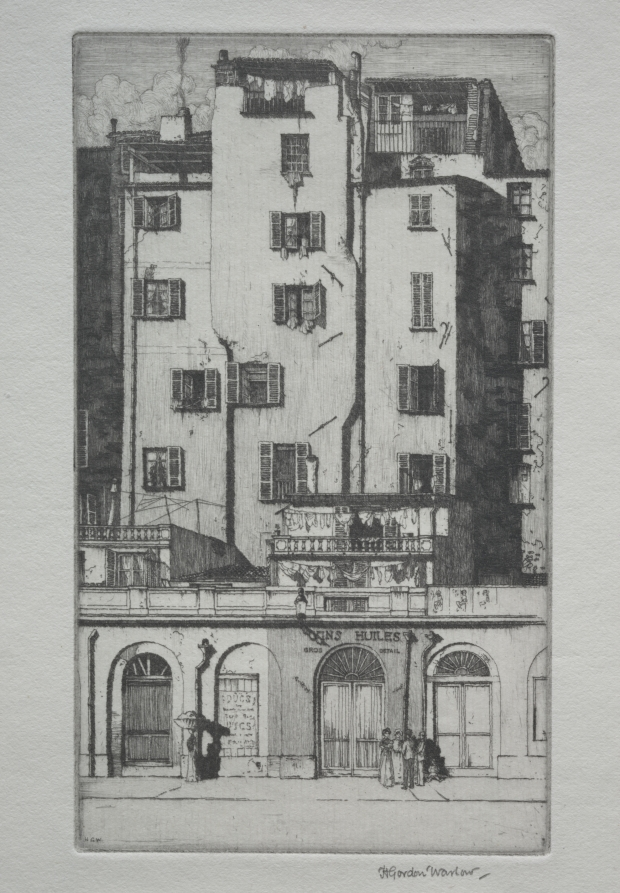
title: Tall Houses, Menton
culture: England, 20th century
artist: Herbert Gordon Warlow (British, 1885–1942)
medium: drypoint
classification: Print